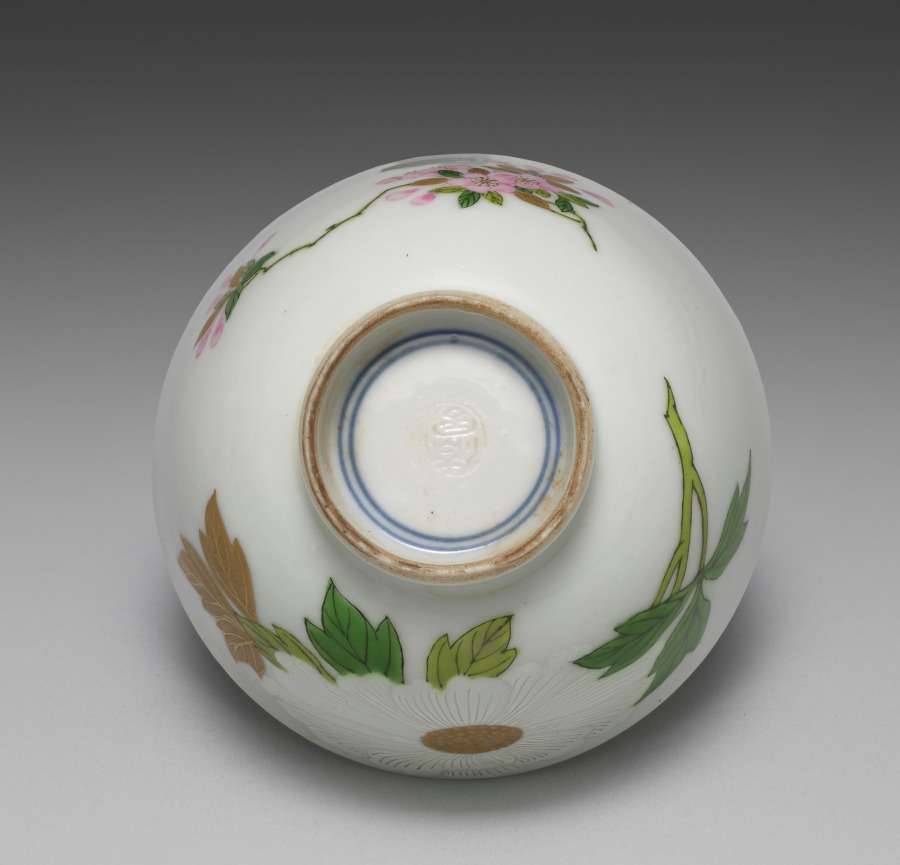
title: Teabowl from Teabowls with Peony and Crabapple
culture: Japan, Meiji period (1868–1912)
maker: Seifū Yohei III (Japanese, 1851–1914)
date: 1893–1914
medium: One from a set of five teabowls; porcelain with underglaze and overglaze color enamels and gold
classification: Ceramic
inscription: 清風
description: Overglaze color enamels are generally called iro-e (literally “color picture”) in the terminology customarily used for porcelain decoration of the Edo period. This set of teabowls is a fine example of Yohei III’s skilled use of the technique, which is identified on this set’s box lid with the alternate phrasing “porcelain with color painting” (jisaiga). Distinct from the way overglaze colors were used in Kakiemon ware from Arita, his designs and applications show a consciousness of porcelain decoration of the Qing dynasty. Here, he combines Chinese models with a sensibility taken from Kyoto ware precedents, including painting with powdered gold (kinrande). The colors used in the bowls are as follows: blue, black, gold, white, light green, green, and pink. The black iron, used for stems and leaf veins, is painted over the glaze. The gold, also painted over the glaze, is used for leaves and the centers of flowers, for solid, glossy lines defining detail, or as a semimatte ground. The white of the peony flower is built up to a low relief over the glaze. Yohei has incised lines of varying widths into the pigment, carving away to the bowl’s surface, to differentiate individual petals and their rippled shapes. The light and dark greens, as well as the pink, are painted over the glaze. Of note is how Yohei has first used thinly applied lines of light green to draw the plum branch before applying the opaque iron black. For the plum buds and flowers, he has used a diluted pink with an opaque pink for outline, both over the glaze. In his later works, Yohei used pink both over and under the glaze in a manner similar to underglaze blue, and it can be challenging in some cases to discern which technique he has used. A lidded container in a private collection has a similar design but is augmented with the inclusion of white and purple magnolia blossoms. In contemplating the original decorative program of a set, of which these teabowls may have been a part, it is worth considering that perhaps not all objects included the full range of motifs. In such cases, the composition of the individual object may be best understood within the context of the extended ensemble. Here, the delicate pink plum on one side of the bowl seems slightly unbalanced with the bold white peony on the other, but when seen with other objects with the magnolia and its additional colors and shapes, it is possible to imagine a set with a complex, balanced design across multiple pieces.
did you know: Blue appears only inside the footring, as a double band of underglaze color.